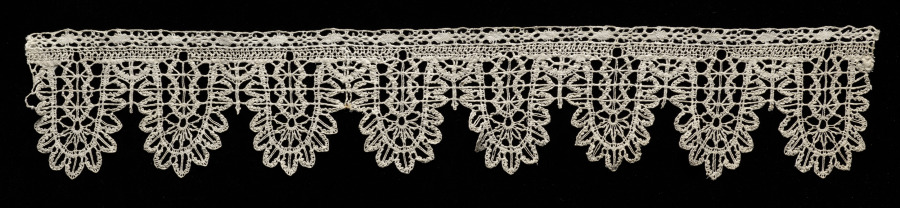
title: Lace Edging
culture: Italy, Genoa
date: 1600s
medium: Bobbin lace (rose lace)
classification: Lace